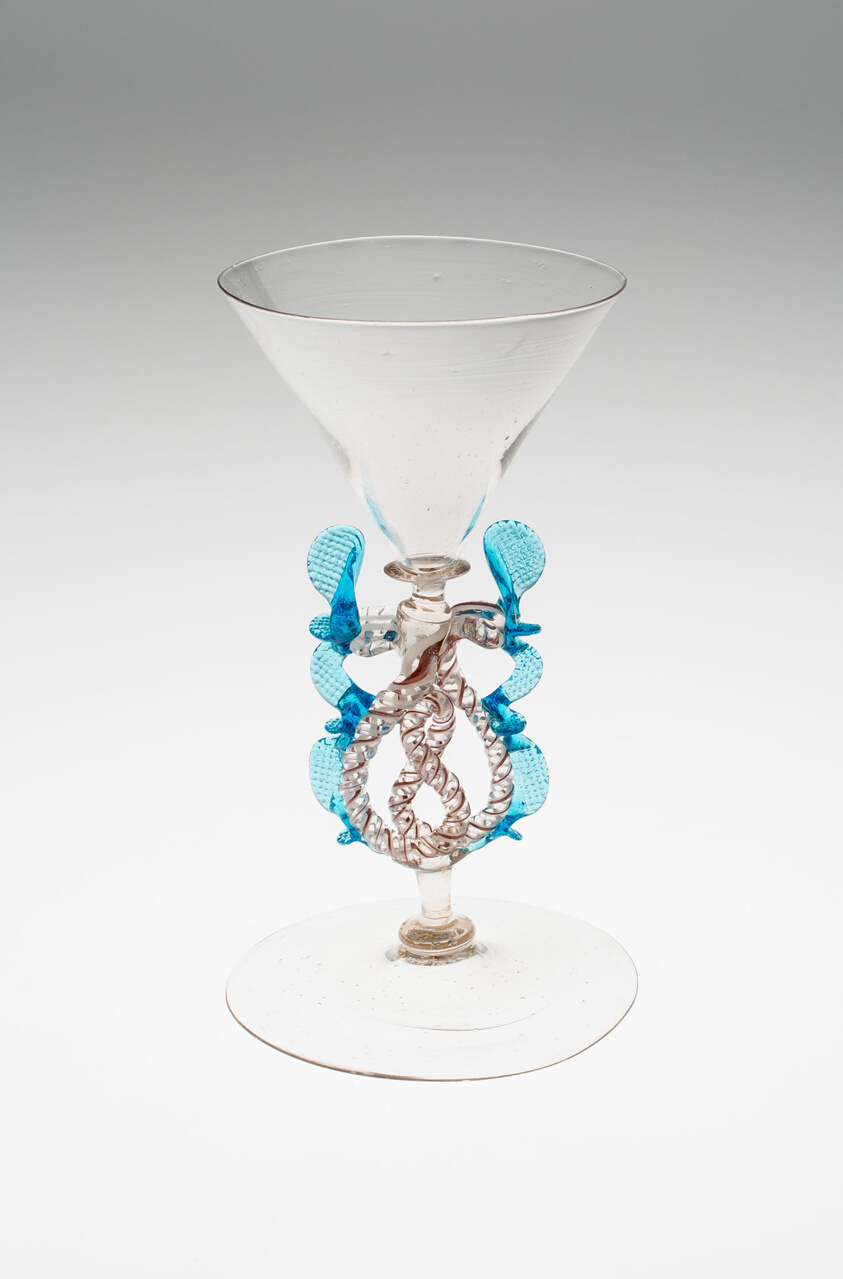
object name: Glass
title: Winged Glass (Flügelglas)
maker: Germany, or Southern Netherlands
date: Late 17th century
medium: Glass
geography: Germany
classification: drinking vessel; glass; european decorative arts